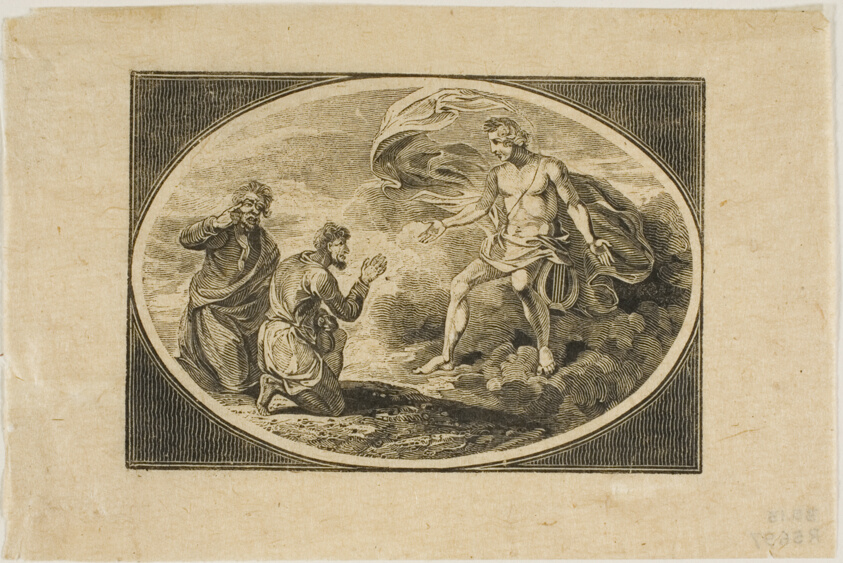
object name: Print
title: Fable: The Envious Man and the Covetous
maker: Thomas Bewick (English, 1753-1828)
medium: Woodcut on paper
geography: England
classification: wood engraving; print; prints and drawing